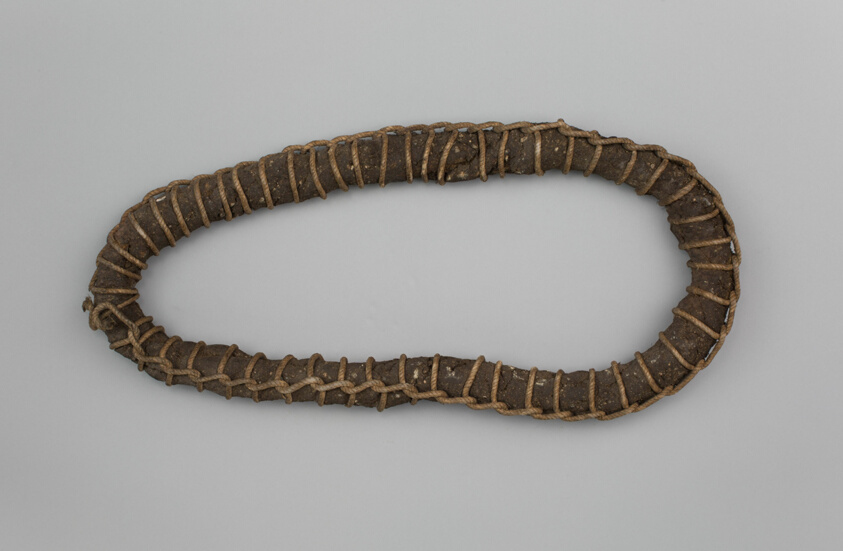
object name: Arms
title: Incendiary Coil ("Crown of Fire")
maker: European, Austrian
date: 16th/18th century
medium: Pitch-covered material, match cord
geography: Austria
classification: arms and armor, miscellaneous; arms and armor; arms